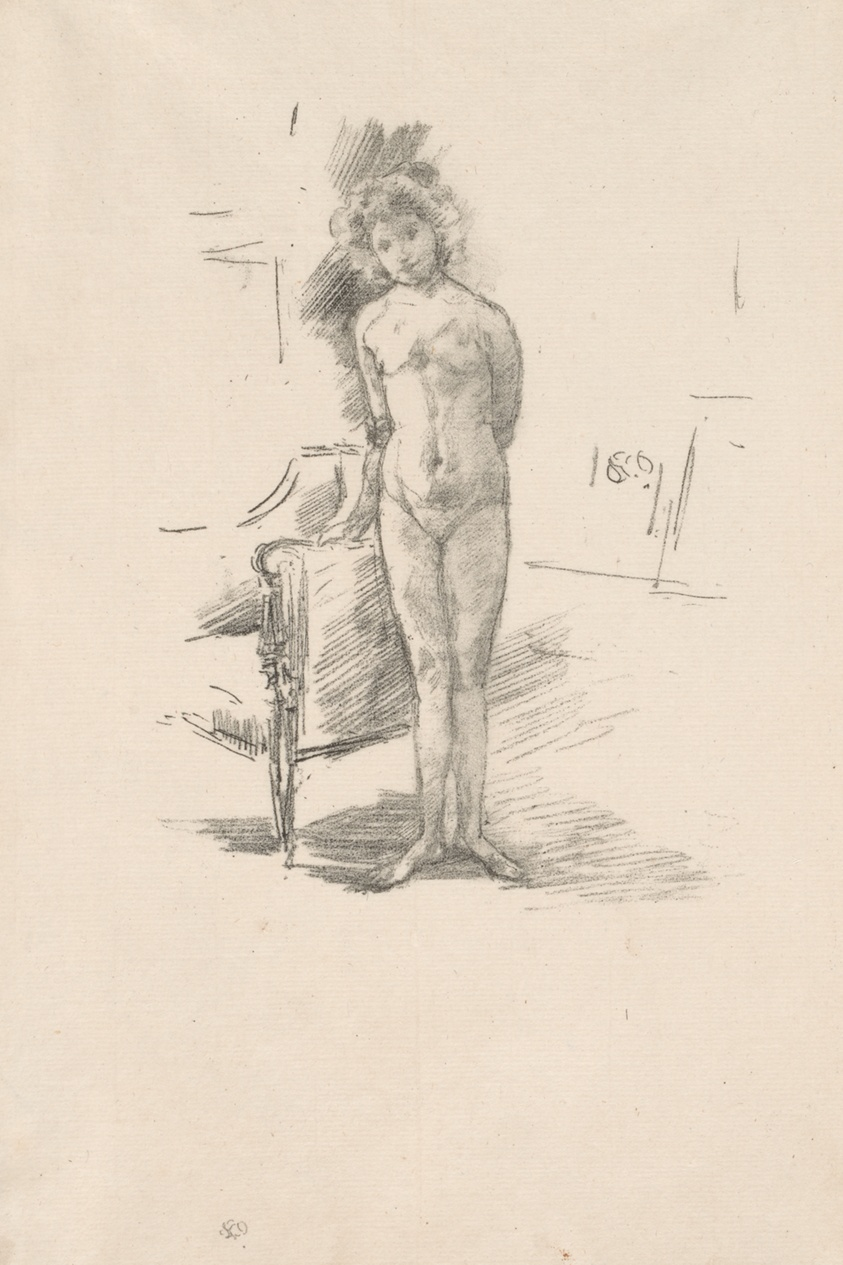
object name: Print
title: Little London Model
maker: James McNeill Whistler (American, 1834-1903)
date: 1896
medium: Transfer lithograph in black on ivory laid paper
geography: United States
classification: transfer lithograph; lithograph; print; prints and drawing; paper